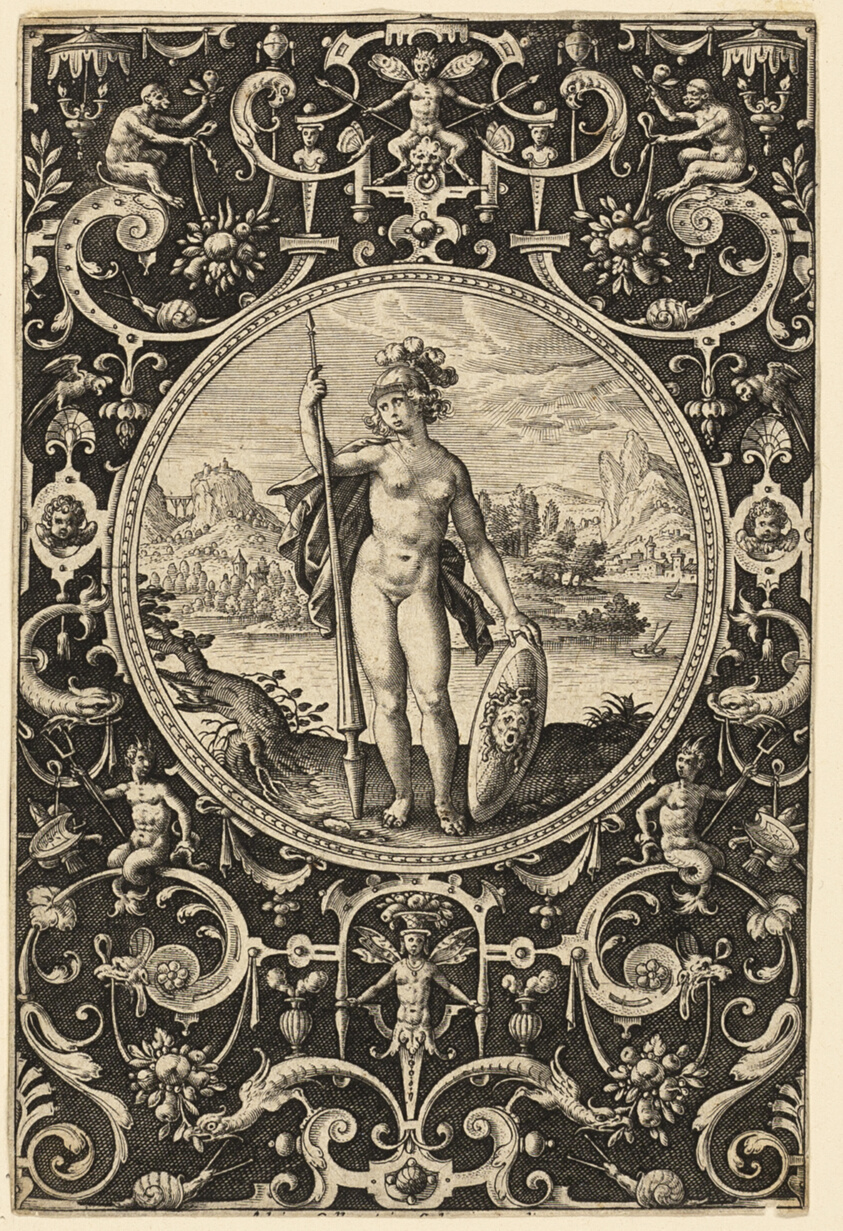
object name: Print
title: Minerva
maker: Adriaen Collaert, II; Flemish, 1560-1618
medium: Engraving on paper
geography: Flanders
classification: engraving; print; prints and drawing